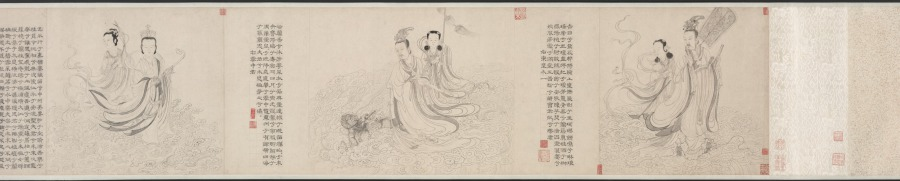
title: Nine Songs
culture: China, Yuan dynasty (1271-1368)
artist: Zhang Wo (Chinese, active c.1336–after 1364)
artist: Chu Huan (Chinese, active 1361)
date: 1361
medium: handscroll; ink on paper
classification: Painting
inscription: 7 colophons and 47 seals: 1 colophon, dated 1361, and 28 seals of Chu Huan 褚奐 (active c. 1361); 1 colophon, dated 1785, and 1 seal of Lu Shihua 陸時化 (1714-1779); 2 seals of Lu Yü-ch'ing (18th c.); 1 colophon, dated 1935, of Ye Gongchuo 葉恭綽 (1881-1968); 1 colophon, dated 1935, of Wu Hufan 吳湖帆(1894–1968); 1 colophon, dated 1938, and 1 seal of Wang Tongyu 王同愈 (1856-1941); 1 colophon, dated 1941, of Wu Huayuan 吳華源 (1893-1972); 1 colophon, dated 1942, and 9 seals of Xu Bangda 徐邦達 (1911–2012); 1 colophon, dated 1942, of Lang Jingshan 郎靜山 (1892-1995); 1 colophon, dated 1944, of Tang Yun 唐雲 (1910-1993); 6 seals of Wang Jiqian [C.C. Wang] 王季遷 (1907–2003).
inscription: Text of The Nine Songs written by Chu Huan at the end of each section.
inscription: 右離騷九歌圖，宋龍溟居士李公本，淮南張渥叔厚所畫妙絕當世。家藏請予書其辭目識于左。至正二十一年辛醜三月旦河南褚奐記。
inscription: Colophon by Lu Shihua 陸時化 (1714–1789): This scroll is fortunate to have been handed down from collections of the right people. Now, after 500 years, its condition is as good as when it was painted. I acquired this from Mr. Shen Guiyu [1673-1769], the President of the Board of Rites. The label is in his handwriting when he was 95 years old. I submit that Chu Huan (t. Shiwen) of the Yuan Dynasty was a native of Qiantang. His "seal" and li writings are in the style of Wu Rui. For example, in [Chu Kuei's] Ming ji lu [A list of masterpieces] is recorded the stele commemorating the restoration of the prefectural school of Kun-shan, the text of which was composed by Yang Weizhen in the twenty-first year of Zhizheng [1361]; and the calligraphy as well as the title in li style was by Chu Huan, who was at that time an assistant judge of the prefecture of Haining in the circuit of Hangzhou. Zhang Wo's zi is Shuhou (叔厚). His literary name is Zhen Qisheng (贞期生). According to [Gu Ying's] Yu shan cao tang ya jii, he liked to paint in the bai-miao or the "pure delineation" style after the method of Li Longmian [Li Gonglin 李公麟], which finds no peer among the ancient masters. This is agreed upon [by Pei Ch'iung] in his Qing jiang zhi who praised [Zhang Wo] as being quite learned and well-versed in many branches of the arts, especially figure painting. Recorded by Lu Shihua [The mountain dweller], listening to the pine, in the twelfth month of the yisi year [1785].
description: Painted in the baimiao, or fine-line drawing style, this ancient work demonstrates the literati’s use of abstract calligraphic brushwork for self-expression. The subject of the “Nine Songs”—songs associated with shamanistic rituals in the ancient Chu kingdom—had traditionally provided artists with myths and legends that they could explore and reinterpret in their own works.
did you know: Divided into eleven sections, the scroll contains illustrations by painter Zhang Wu followed by a transcription of the relevant verse by calligrapher Chu Huan.